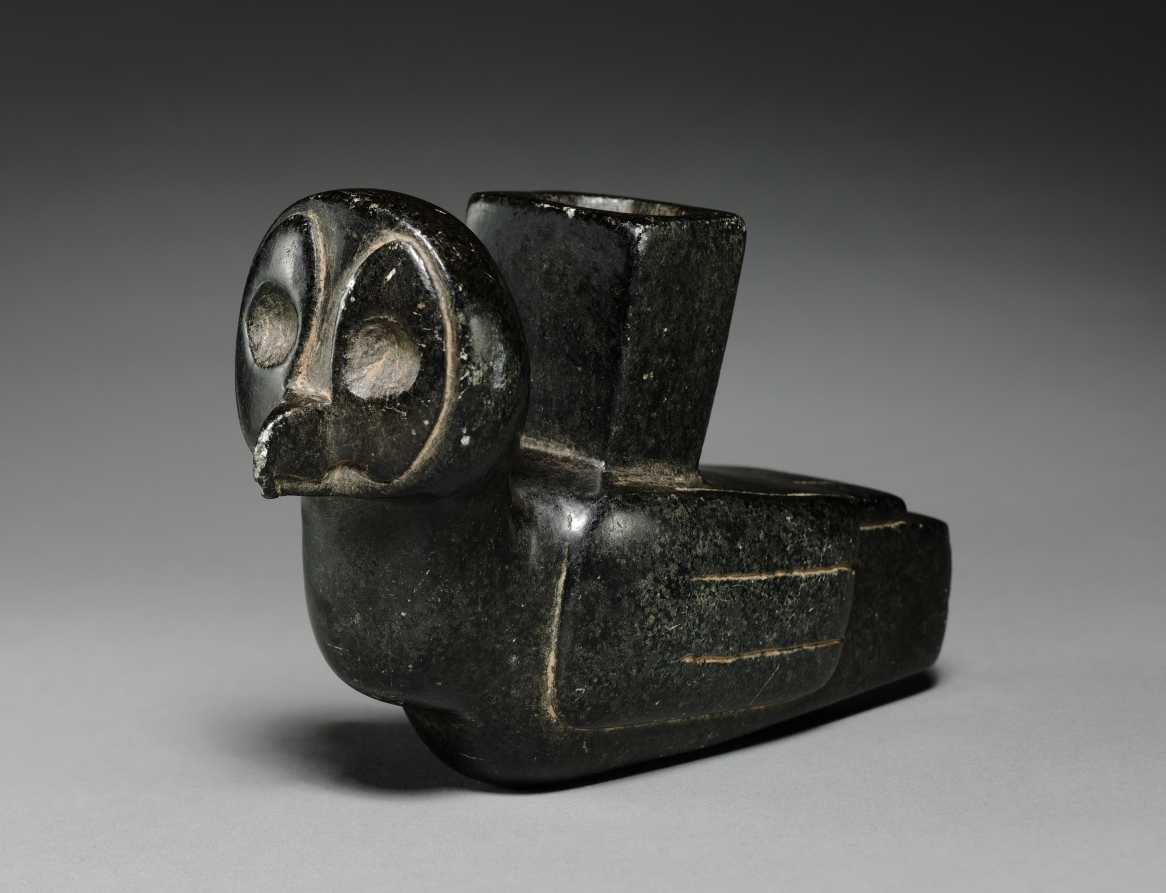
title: Pipe in the Form of an Owl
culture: America, North American Indian, Copena Culture (Tennessee area?)? or modern reproduction, Middle Woodland Period (100-600) or 20th century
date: 100–600 CE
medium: stone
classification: Sculpture